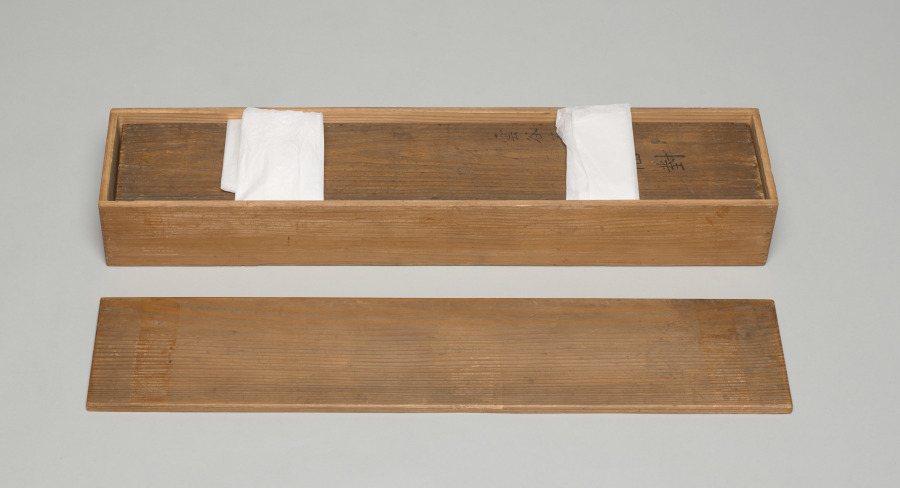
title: Landscapes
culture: Japan, Edo period (1615–1868)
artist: Unkoku Tōyo (Japanese, 1612–1688?)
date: mid- to late 1600s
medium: pair of hanging scrolls; ink and light color on paper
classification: Painting